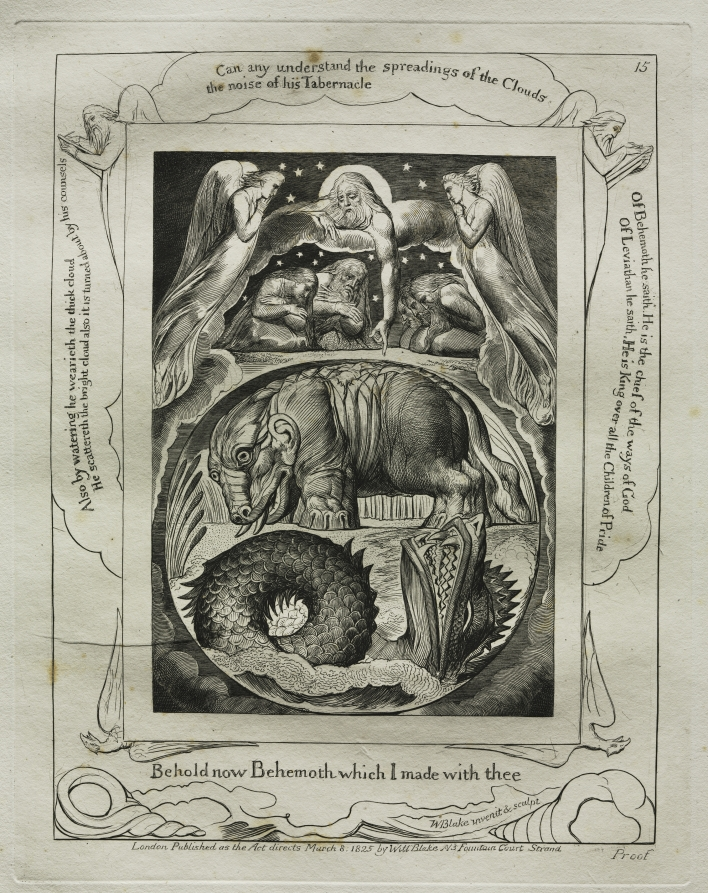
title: The Book of Job: Pl. 15, Behold now Behemoth which I made with thee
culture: England, 18th century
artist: William Blake (British, 1757–1827)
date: 1825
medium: engraving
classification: Portfolio